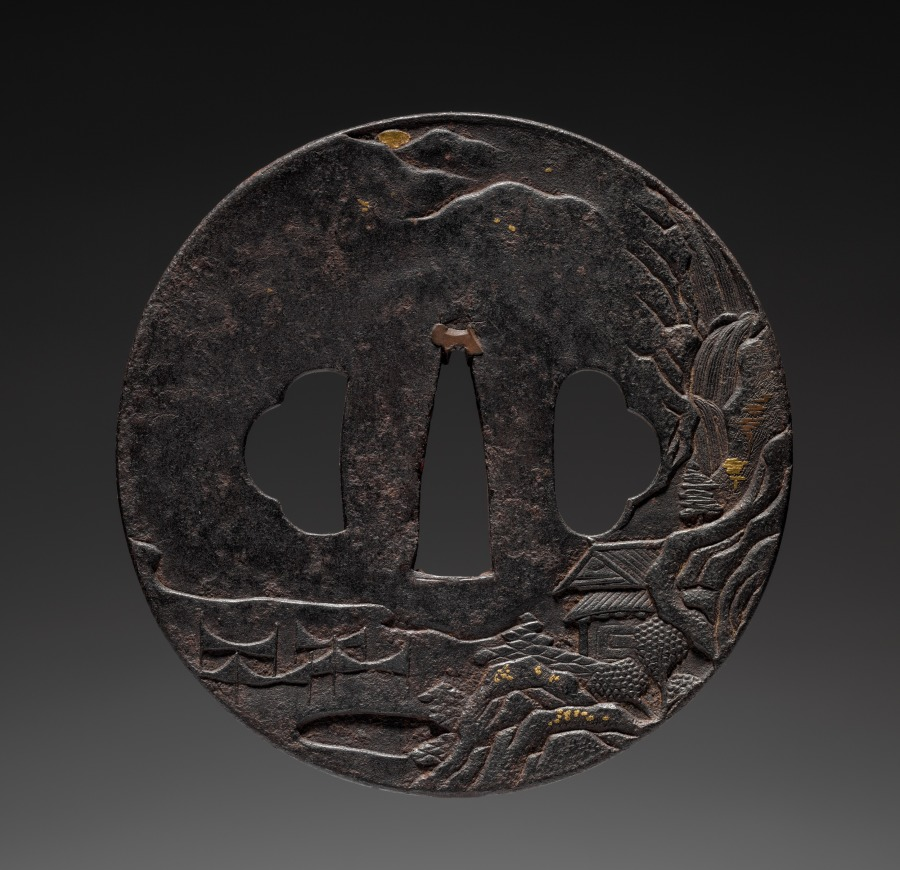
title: Sword Guard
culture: Japan, Edo period (1615–1868)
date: mid-1700s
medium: iron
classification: Arms and Armor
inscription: signed: 長州萩住八道友信作